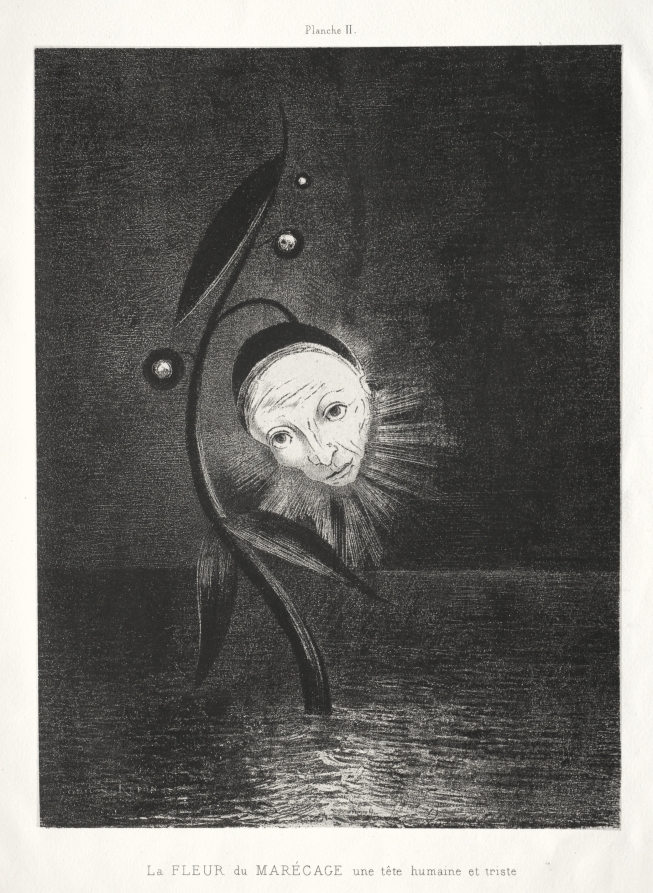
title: The Marsh Flower, a Sad Human Head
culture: France, 19th century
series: Homage to Goya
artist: Odilon Redon (French, 1840–1916)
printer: Lemercier & Cie.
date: 1885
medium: lithograph on China paper laid on wove paper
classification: Print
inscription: printed above image at center: Planche II.; below image at center: La FLEUR du MARÉCAGE une tête humaine et triste.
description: This series is one of many that Odilon Redon created throughout his career. Nearly two-thirds of his lithographs took the form of portfolios—prints connected conceptually by a theme or narrative and physically by a folder or binding. Such works were often dispersed over time, but Cleveland was fortunate to acquire several complete sets with their original covers during the 1920s. Dating from Redon’s early experimentation with lithography, Homage to Goya was intended as a tribute to 18th-century Spanish master Francisco de Goya, whose interest in dreams and the subconscious influenced Redon. The six seemingly unrelated images celebrate Goya’s ambiguity and collectively suggest the introspection and isolation of artistic practice.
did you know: This portfolio was published in an edition of 50, one of which Redon sent to poet Stéphane Mallarmé soon after Redon became a frequent participant in a literary salon held regularly at Mallarmé's home.